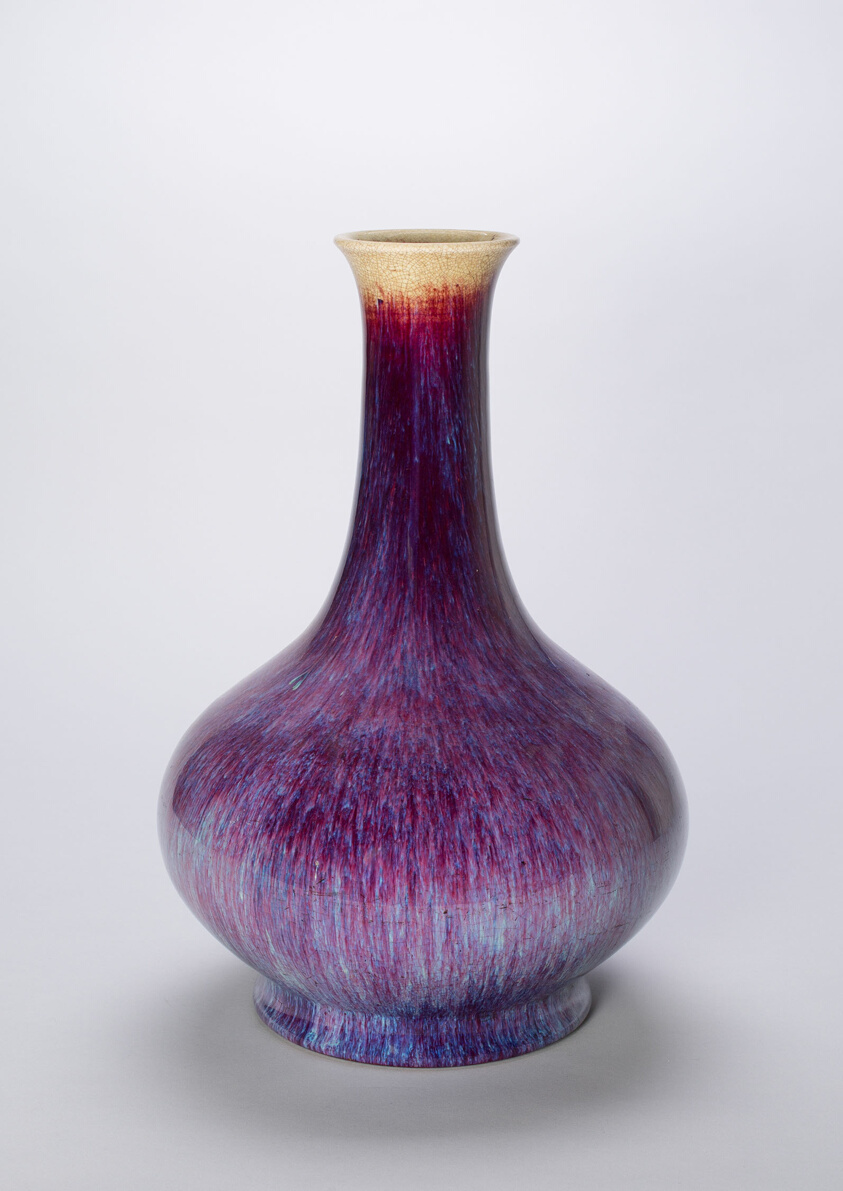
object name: Vessel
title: Bottle-Shaped Vase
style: Chinese (culture or style)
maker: China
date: Qing dynasty (1644–1911), c. 18th century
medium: Porcelain with purple flambé glaze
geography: China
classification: vase; stoneware; vessel; asian art; ceramics